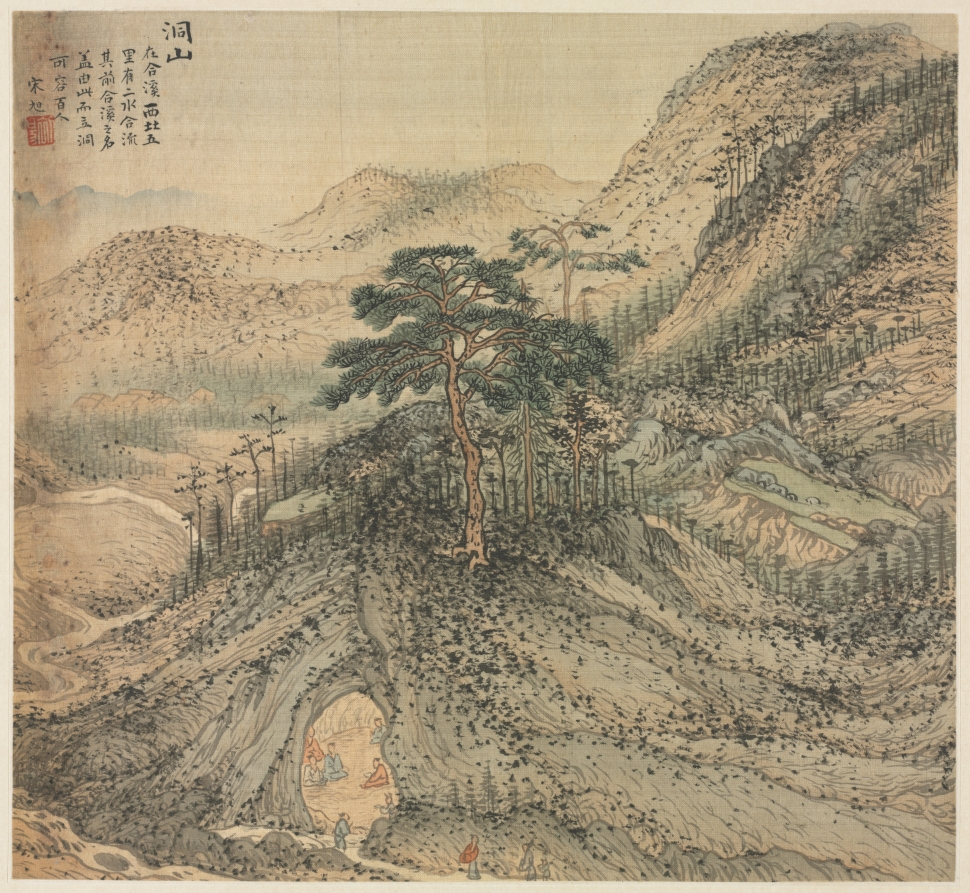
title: Mt. Dong (Grotto Mountain)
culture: China, Jiaxing, Ming dynasty (1368–1644)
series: Eighteen Views of Huzhou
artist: Song Xu (Chinese, 1525-c. 1606)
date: c. 1588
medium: Album leaf; ink and color on silk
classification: Painting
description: This album of landscape paintings depicts the famous scenic areas located in and around the city of Wuxing in southeastern China. These places were all known for their natural beauty, but in addition, a number were distinguished by their links to eminent historical figures and events. The artist, Song Xu, was not a native of Wuxing, but must have visited it when he accepted the commission, for he carefully depicted all eighteen views and wrote comments on each of them. Song's gazetteer-like notation on this leaf reads: Grotto Mountain: Five li northwest of Hexi, there are two streams converging; Hexi (literally converging streams) is derived from this. The cave can hold a hundred people.